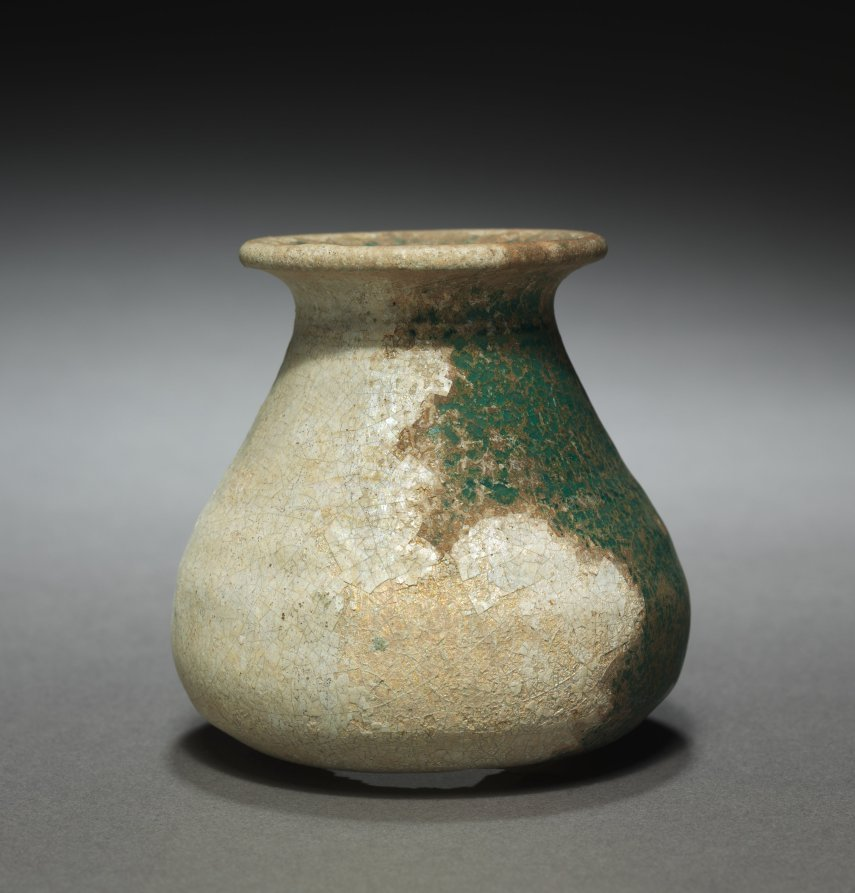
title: Small Pitcher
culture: Parthian Empire (247 BCE–224 CE)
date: 1–200 CE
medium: terracotta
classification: Ceramic